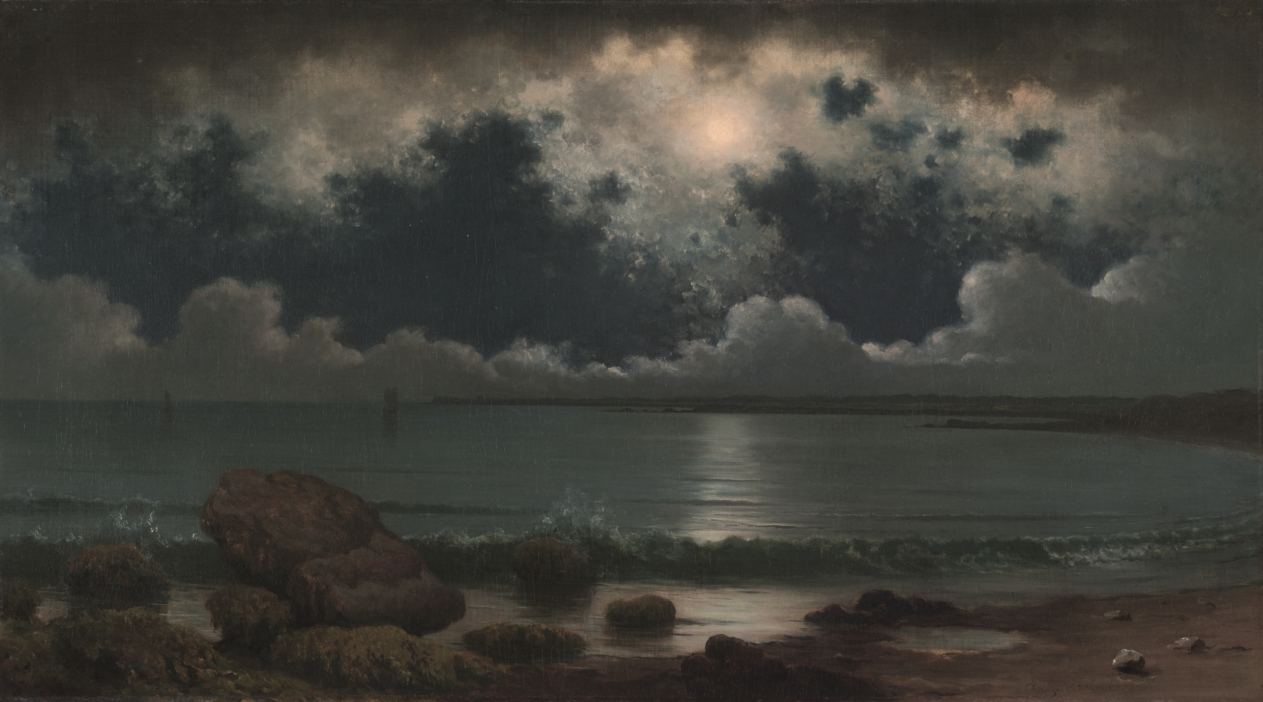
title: Point Judith, Rhode Island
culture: America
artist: Martin Johnson Heade (American, 1819–1904)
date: 1867–68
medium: oil on canvas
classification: Painting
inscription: Signed lower right: M.J. Heade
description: One of only a handful of nocturnal scenes painted by Heade, this evocative painting captures the effects of glimmering moonlight on land, sea, and sky. Although the artist depicts a specific location, his nighttime rendering shrouds most details in shadow, imparting a greater sense of mood than place. Human presence manifests itself through two sailing ships on the left side of the composition.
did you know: Home to Point Judith, the beach town of Narragansett has its population double during summertime.